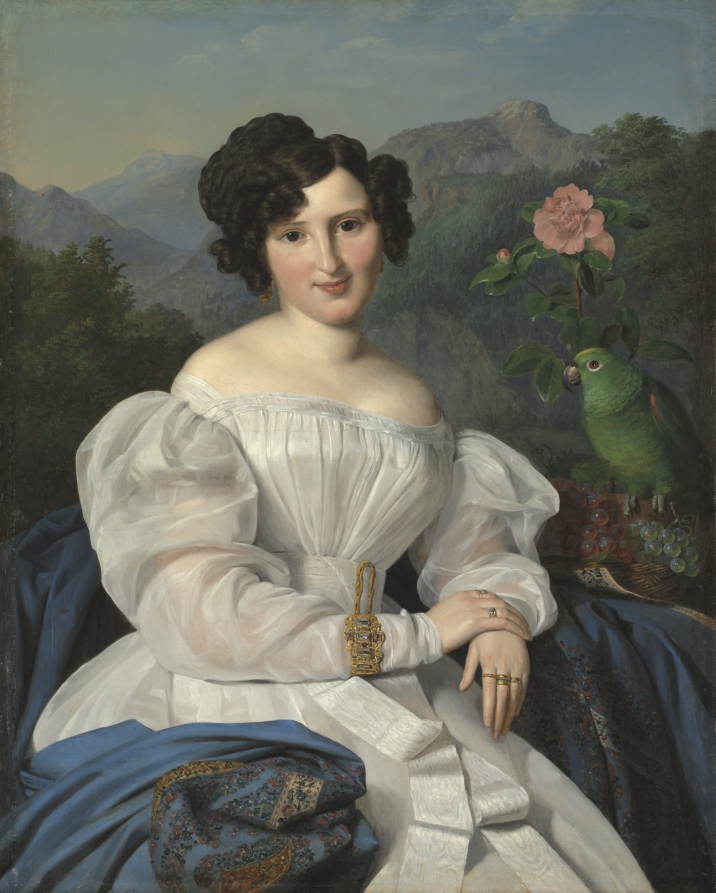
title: Countess Széchenyi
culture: Austria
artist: Ferdinand Georg Waldmüller (Austrian, 1793–1865)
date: 1828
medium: oil on fabric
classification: Painting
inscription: Signed below the parrot: Waldmül[. . .] 1828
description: This portrait typifies painting in Vienna between 1815 and 1865, an era known as the Biedermeier period, during which the Habsburg government promoted positive artistic depictions of Viennese life and culture. The mountains in the background express both the artist's romantic fascination with nature and patriotic devotion to his Austrian homeland. The sitter, Crescentia Seilern, was a prestigious member of the aristocracy who married Hungarian reformist patriot István Széchenyi.